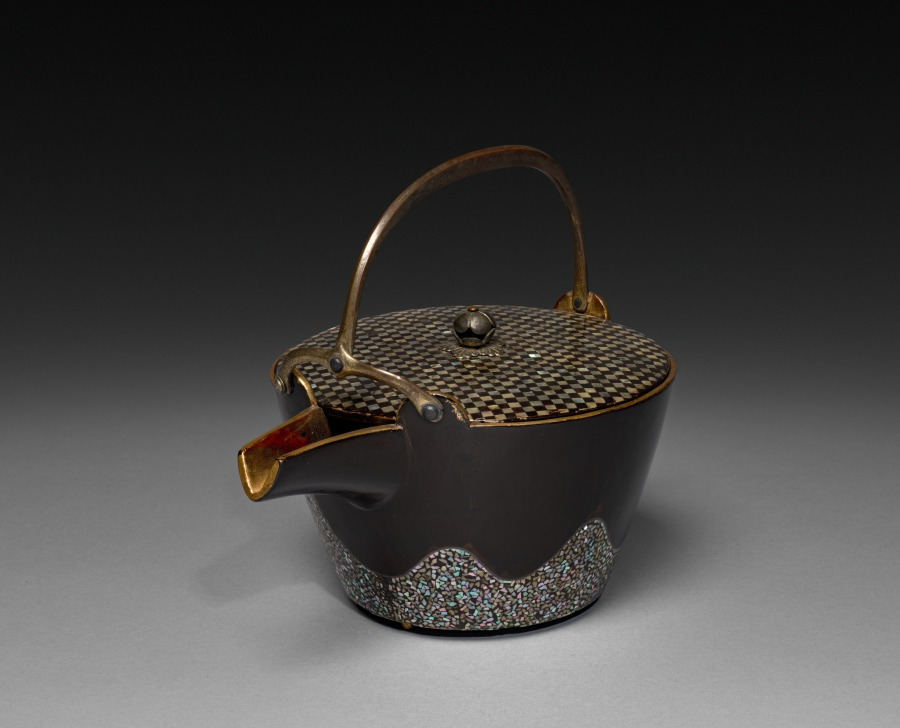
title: Wine Ewer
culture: Japan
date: late 1700s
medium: lacquer, nacre and metal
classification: Lacquer